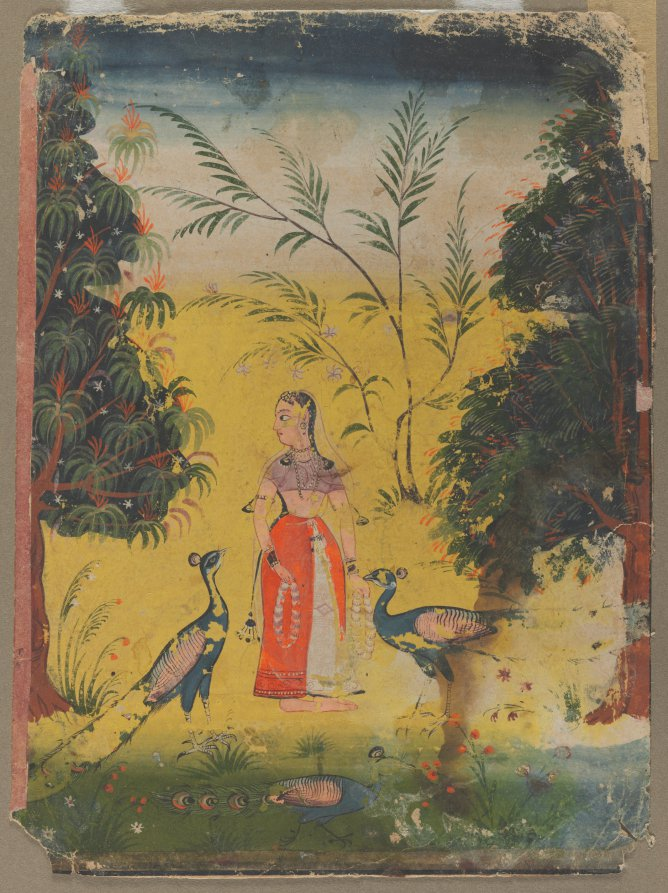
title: Kakubha Ragini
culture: India, Mughal Dynasty (1526-1756)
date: c. 1610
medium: Gum tempera and gold on paper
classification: Painting